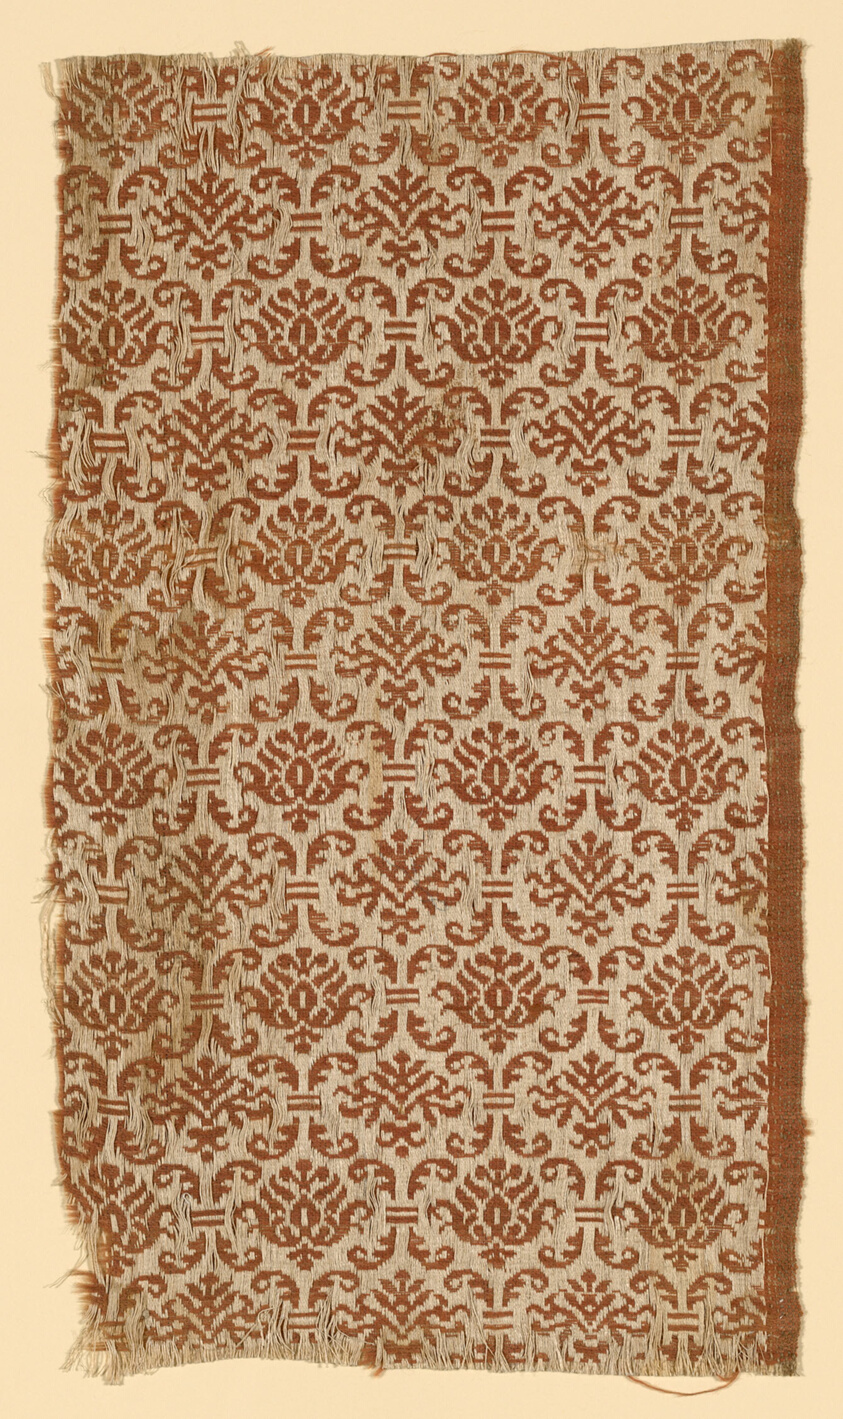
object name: Textile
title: Fragment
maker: Europe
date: 17th century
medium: Linen and wool, plain weave; tied and free double cloth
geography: Europe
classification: textile; weaving